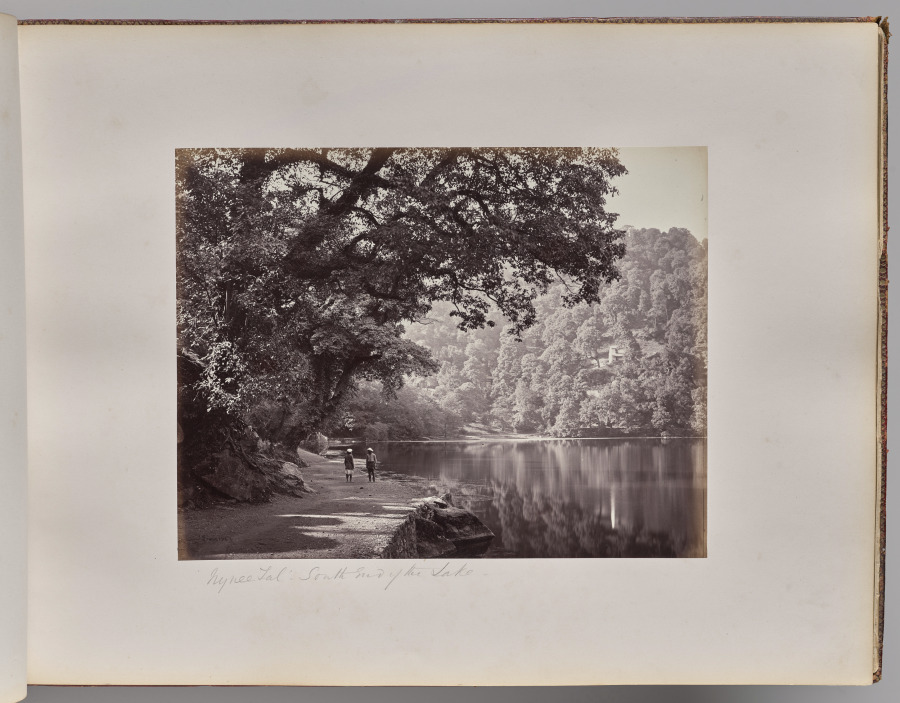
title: Hyree Lake. South End of the Lake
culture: England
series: Photographs of Northern India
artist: Samuel Bourne (British, 1834–1912)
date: 1863–70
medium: albumen print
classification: Photograph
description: The 50 images in this album, all taken in the 1860s, move from the hill towns of the Himalayas down to cities including Lahore (now in Pakistan), Delhi, Lucknow, Agra, Benares (now Varansi), and Calcutta (now Kolkata). Architectural studies of major monuments offer valuable historical records of what sites such as the Taj Mahal and the imperial mosque of the Mughal emperors in Delhi looked like before twentieth-century restorations.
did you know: Samuel Bourne, the author of most the images in this album, was a banker in England before he moved to India to become a professional photographer.